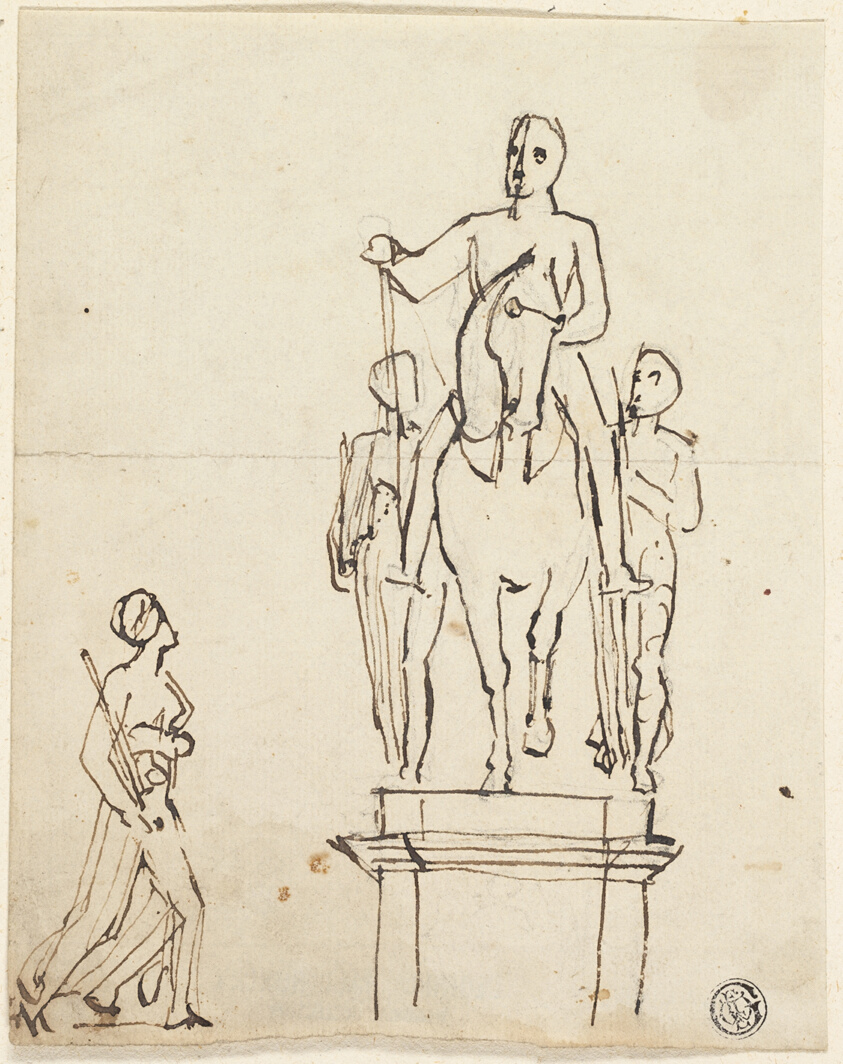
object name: Drawing and Watercolor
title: Sculpture of Horseman Accompanied by Two Standing Figures, with Sketch of One of Latter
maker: Attributed to Thomas Stothard; English, 1755-1834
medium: Pen and brown ink over graphite, on gray laid paper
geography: England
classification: pen and ink drawings; drawings (visual works); prints and drawing